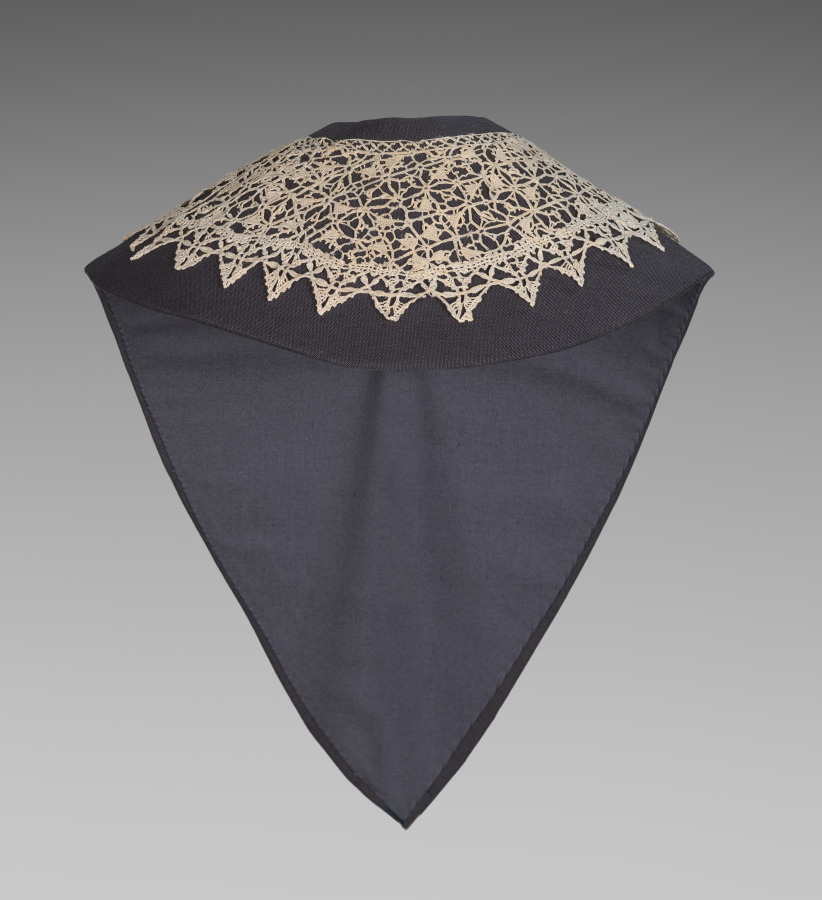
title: Lace Collar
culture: Italy, Genoa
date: 1560–1600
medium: Linen; needle lace (cutwork and reticella) and bobbin lace edging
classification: Lace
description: Large and small round motifs in a linear framework form this geometric design made in open cutwork, now known as reticella. Its fineness was cut from a linen cloth whose woven grid provided a firm ground for the embroiderer to build her lace. A similar design for open cutwork was published in a pattern book by Frederic de Vinciolo in Paris in 1587.